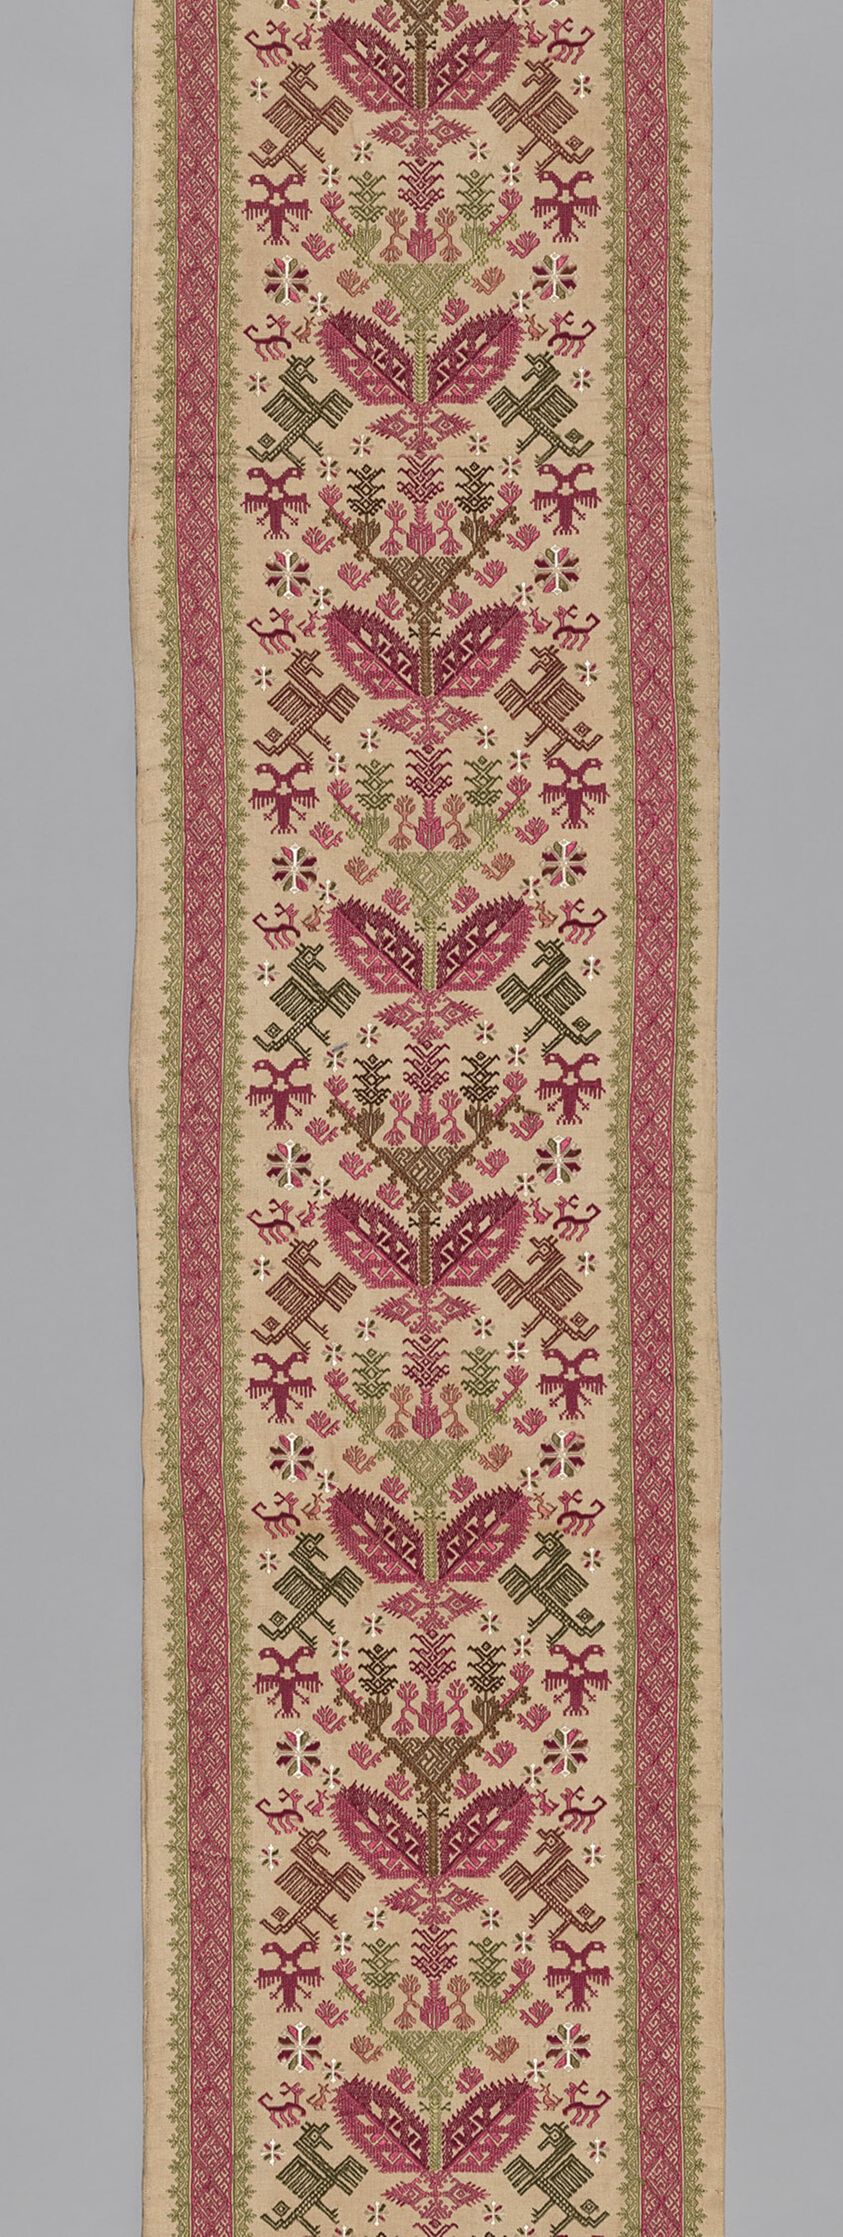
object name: Textile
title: Panel (For a Bed Curtain)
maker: Greece, Dodecanese Islands, Patmos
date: 17th century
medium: Linen, plain weave; embroidered with silk in cross, double running, running (pattern darning), satin, and stem stitches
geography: Patmos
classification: textile; needlework (visual works)